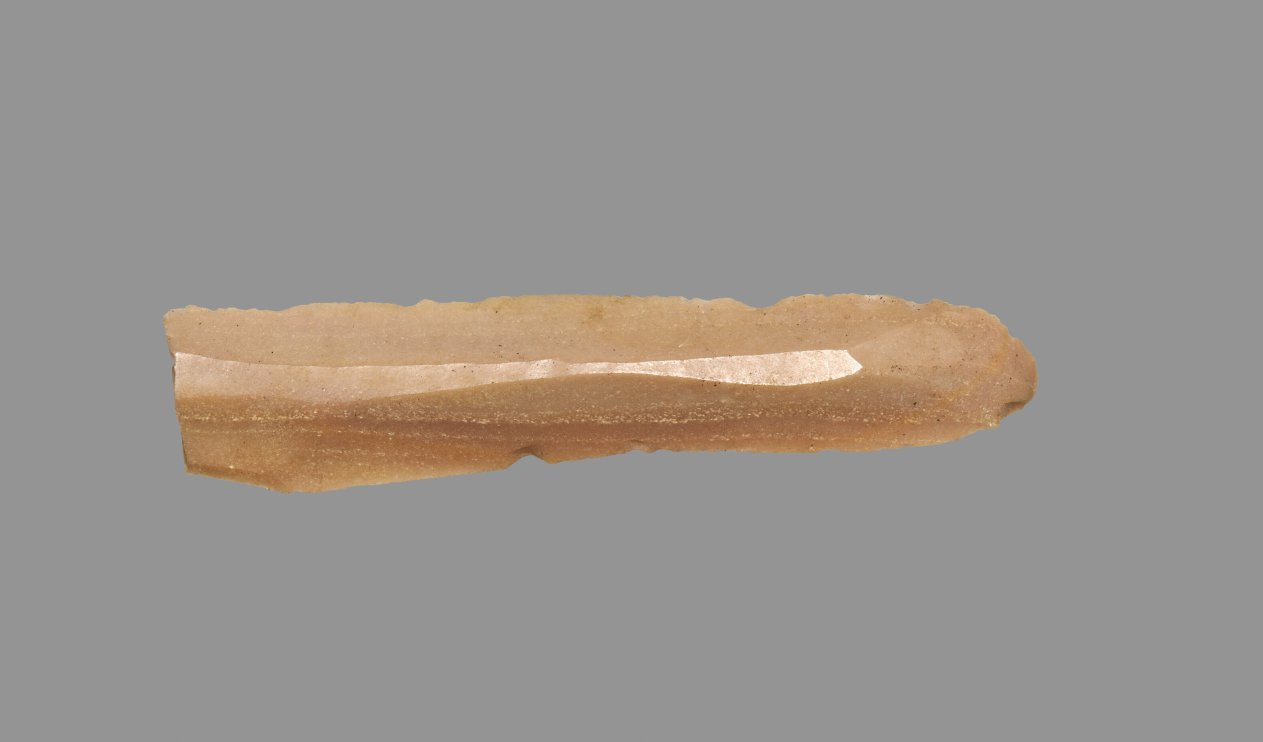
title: Sickle Blade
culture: Egypt, Middle Kingdom (2040–1648 BCE), Dynasty 12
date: 1980–1801 BCE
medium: flint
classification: Implements